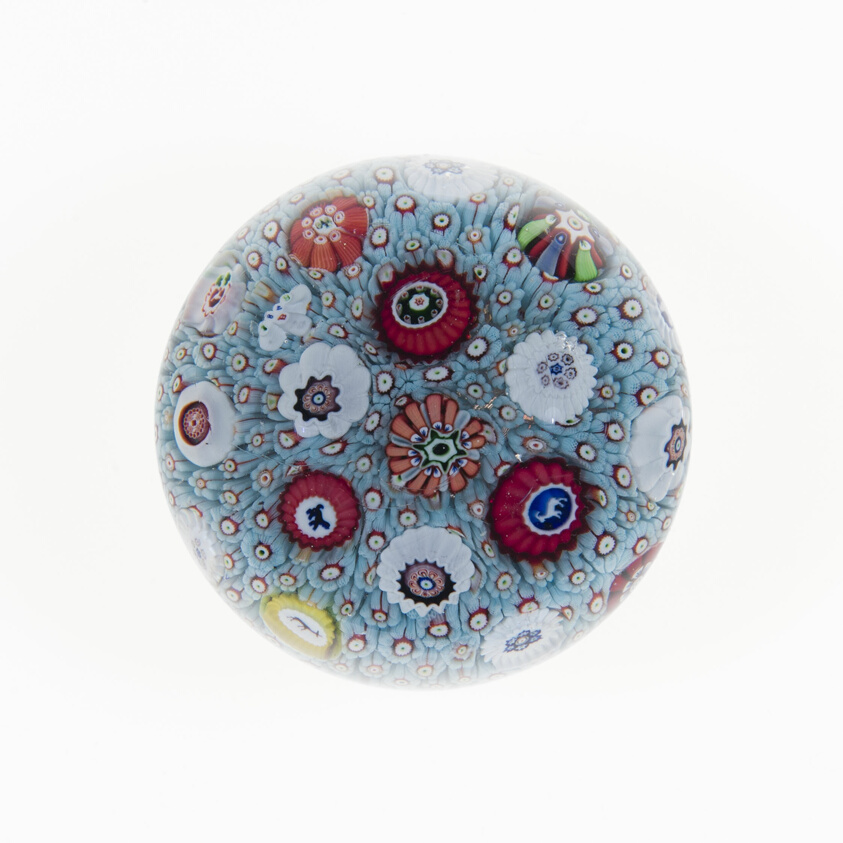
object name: Glass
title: Paperweight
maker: Baccarat Glassworks (Cristalleries de Baccarat); Lorraine, France, founded 1764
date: c. 1845/60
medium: Glass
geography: France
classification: paperweight; glass